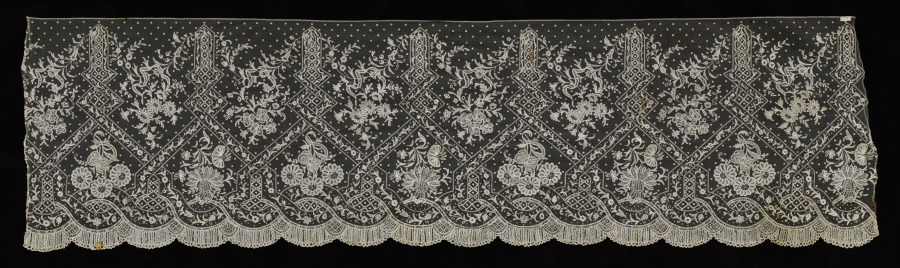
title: Lace Flounce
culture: Belgium, Brussels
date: 1811–99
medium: Machine-made lace net ground with bobbin lace appliqué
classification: Lace